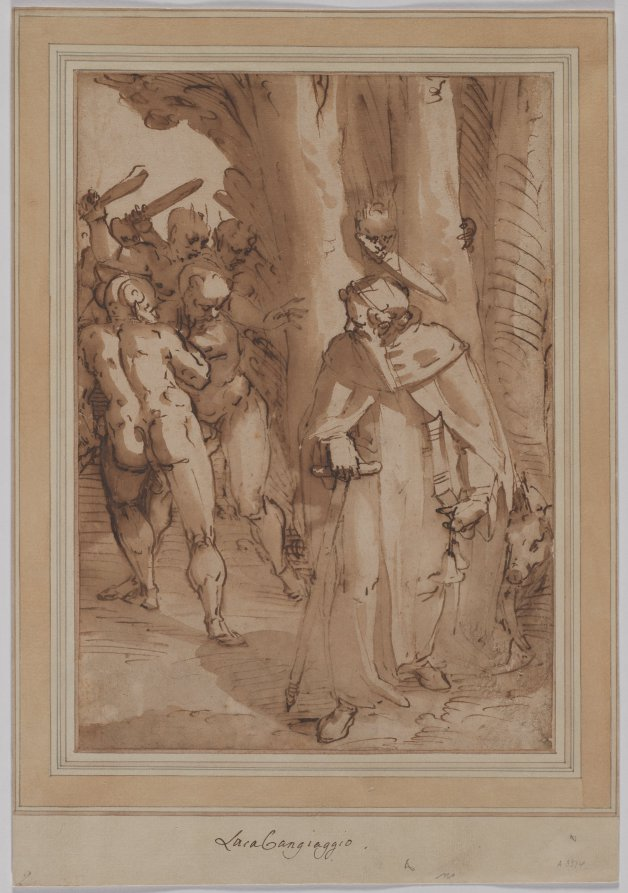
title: Temptation of Saint Anthony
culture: Italy, 16th century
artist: Luca Cambiaso (Italian, 1527–1585)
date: late 1570s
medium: pen and brown ink and brush and brown wash, over traces of black chalk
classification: Drawing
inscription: VERSO, upper center, in ink: Cambio[jj?]io [visible through transmitted light] ; RECTO OF SECONDARY SUPPORT, lower center, in brown ink: Luca Gangiaggio . ; lower left, in graphite: 2 ; lower center, in graphite: 8 [sideways] ; lower right, in graphite: n ; lower right, in graphite: [8?] [sideways] ; lower right, in graphite: A 3514 .